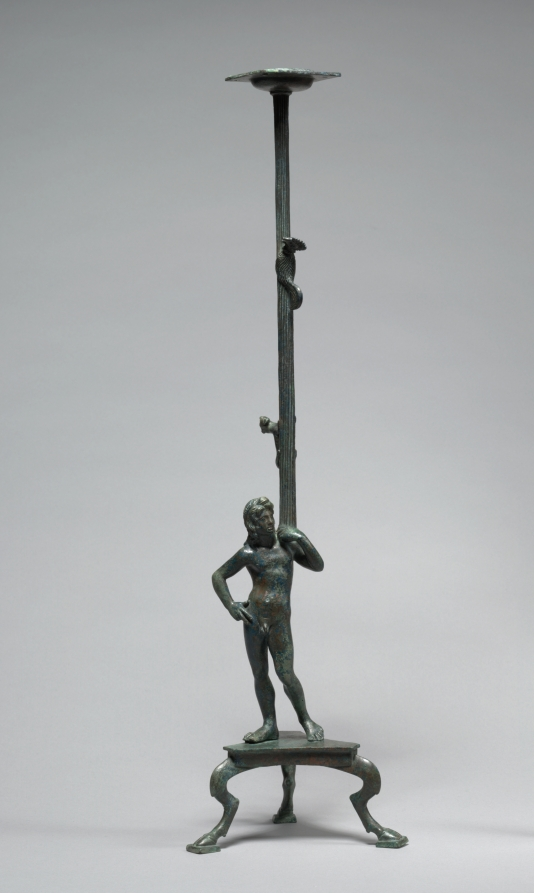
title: Incense Burner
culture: Etruscan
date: 100s BCE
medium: bronze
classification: Metalwork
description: Both elaborate and functional, the Etruscan thymiaterion, or incense burner, typically comprises at least three main parts—tripod stand, shaft, and, at the top, a shallow bowl for incense. Often, a figural support is incorporated, here in the form of a youthful male nude, perhaps the wine god Dionysos. Below him, the tripod stand features cloven hoofs, while above him a spotted cat or panther climbs toward a rooster or other crested bird. Holes in each corner of the square upper plate likely held additional animals or other ornaments.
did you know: The circular depression on the top of this object likely held incense.